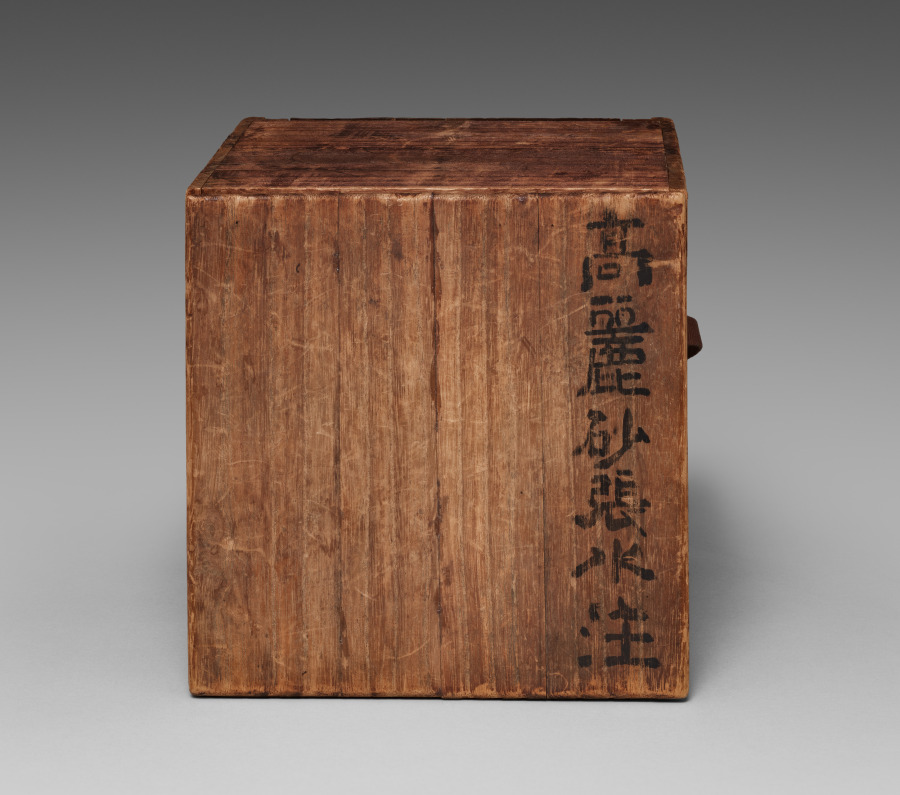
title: Celadon Bowl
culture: Korea, Goryeo dynasty (918–1392)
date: 1200s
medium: Celadon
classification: Ceramic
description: As early as the seventh century, the practice of drinking tea and wine became an important part of elite leisure culture in Korea. A wide bowl like this example was especially suitable for drinking powdered tea shaved from a compressed tea cake, the most commonly enjoyed type during the Goryeo period.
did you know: Crackling occurs when the glaze contracts more rapidly than the clay body during the firing process. In the context of celadon bowls, this phenomenon is not regarded as a flaw but rather as a highly valued aesthetic feature—one that evokes a sense of age.